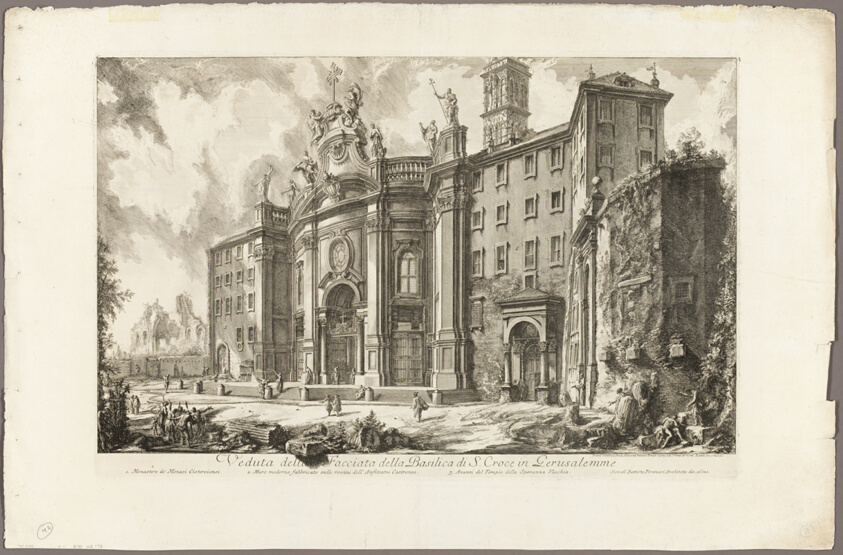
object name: Print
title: View of the Façade of the Basilica of S. Croce in Gerusalemme [the Holy Cross in Jerusalem], from Views of Rome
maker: Giovanni Battista Piranesi (Italian, 1720-1778)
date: 1750/59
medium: Etching on heavy ivory laid paper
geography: Italy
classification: etching; print; prints and drawing